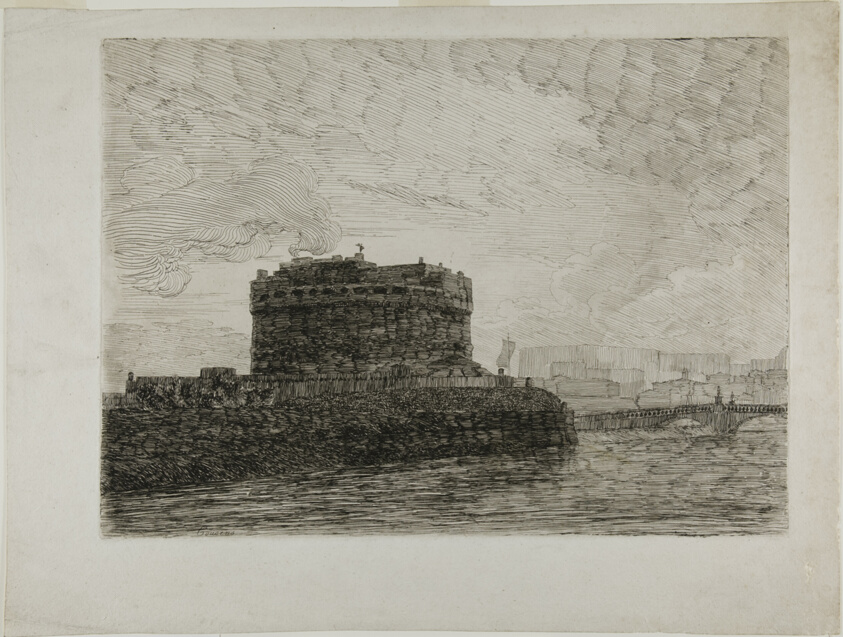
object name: Print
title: Castel Sant'Angelo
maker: Alexander Cozens (English, c. 1717-1786)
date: 1746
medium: Etching on ivory wove paper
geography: England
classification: etching; print; prints and drawing